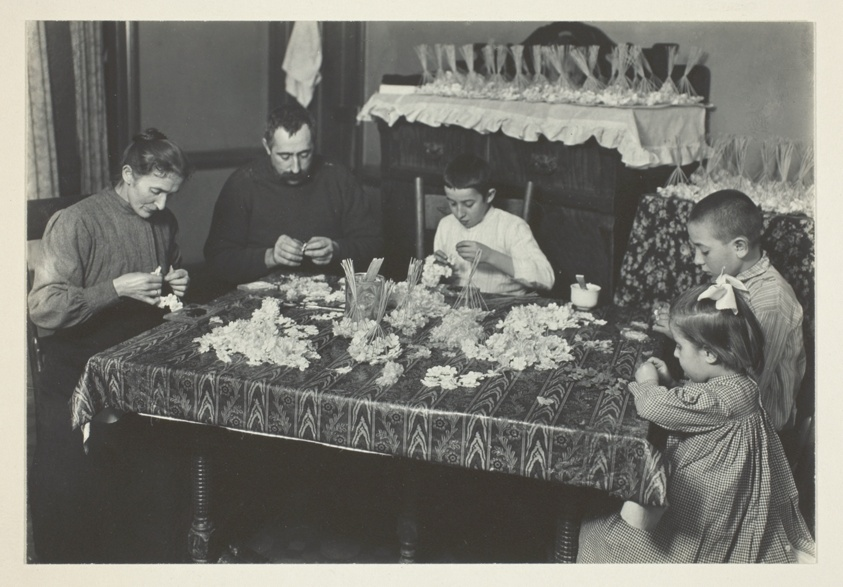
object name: Photograph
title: Family Making Flowers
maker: Lewis Wickes Hine (American, 1874–1940)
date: c. 1915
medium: Gelatin silver print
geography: United States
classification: gelatin silver (developing-out-paper) pr; photographic process; photography; photograph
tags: Collected by Hugh Edwards